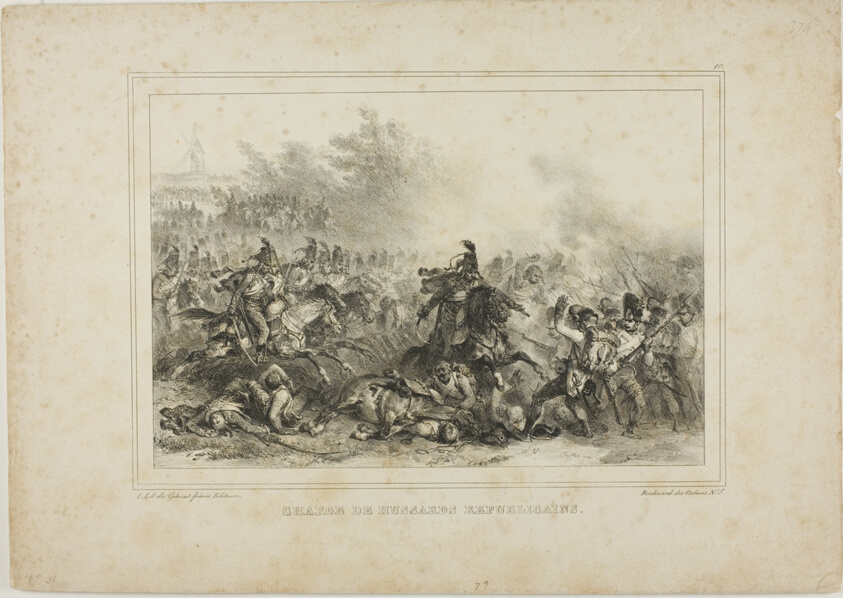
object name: Print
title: Charge of the Republican Hussards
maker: Denis Auguste Marie Raffet (French, 1804-1860); printed by Chez Gihaut Frères (French, 19th century)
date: 1832–33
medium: Lithograph in black on buff wove paper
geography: France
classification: lithograph; print; prints and drawing